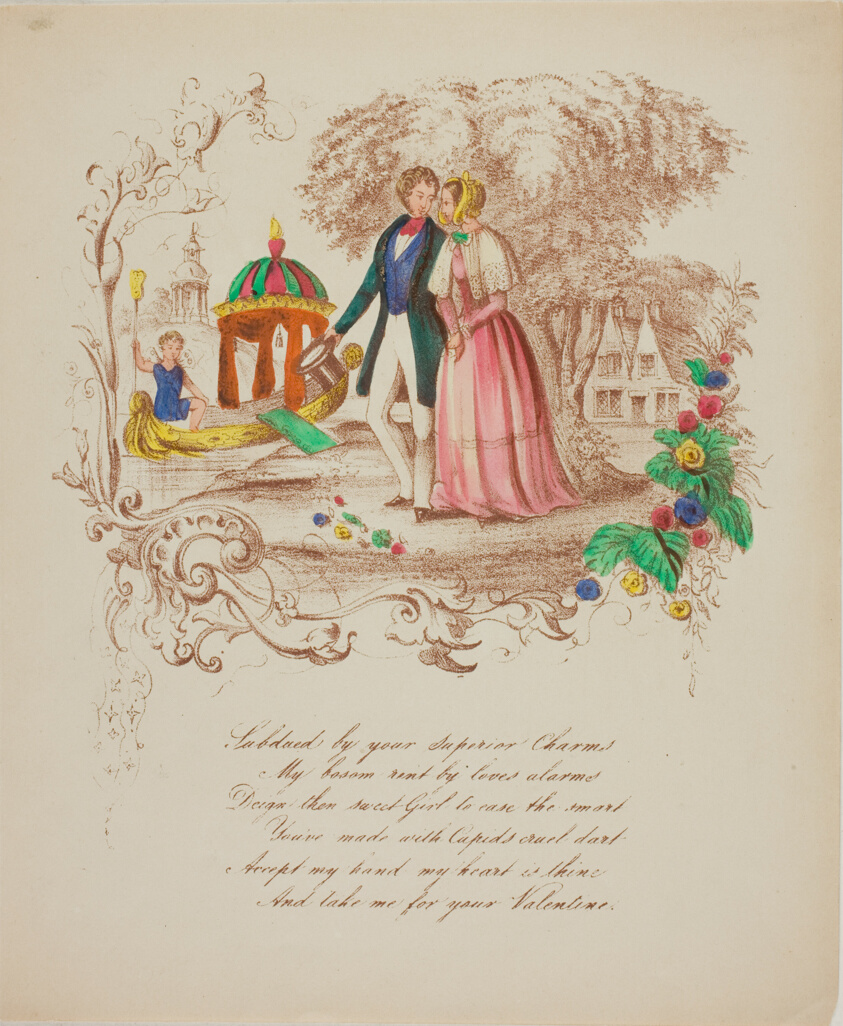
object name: Print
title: Subdued by Your Superior Charms (valentine)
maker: Unknown Artist; English, 19th century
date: c. 1842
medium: Lithograph in brown ink with hand-coloring on cream wove paper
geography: England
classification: valentine; prints and drawing; print